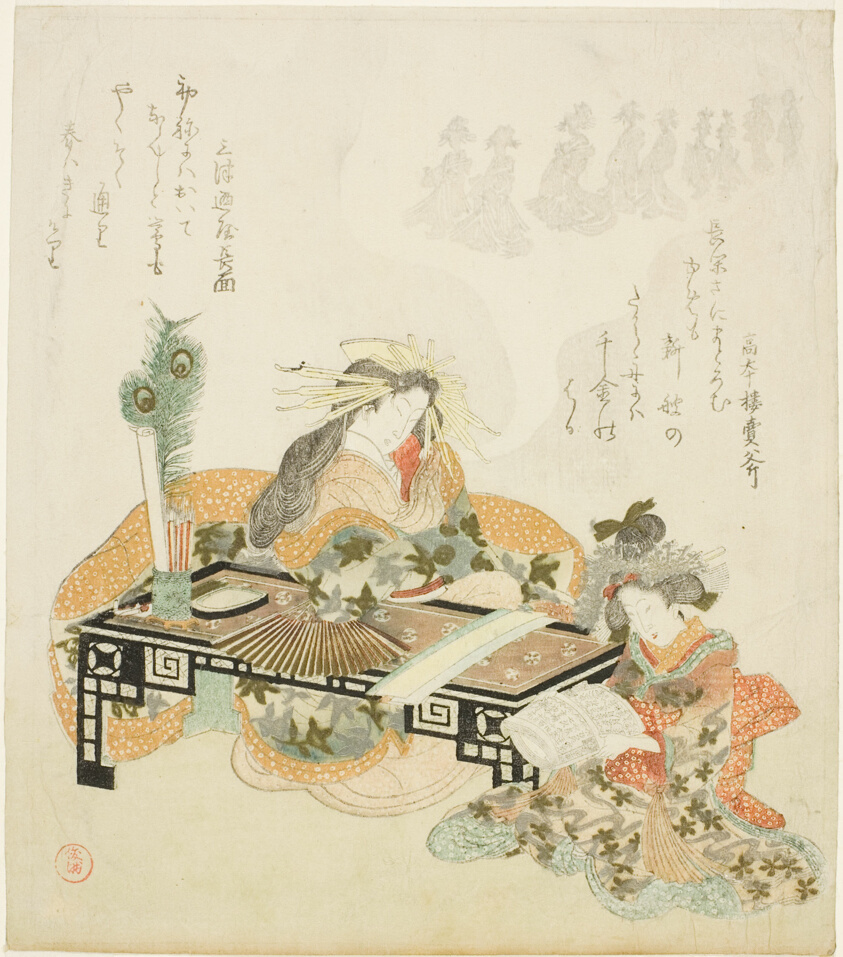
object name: Print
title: Courtesan Dreaming of Procession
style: Japanese (culture or style)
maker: Kubo Shunman (Japanese, 1757–1820)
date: 1814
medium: Color woodblock print; shikishiban, surimono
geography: Japan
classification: woodblock print; print; asian art